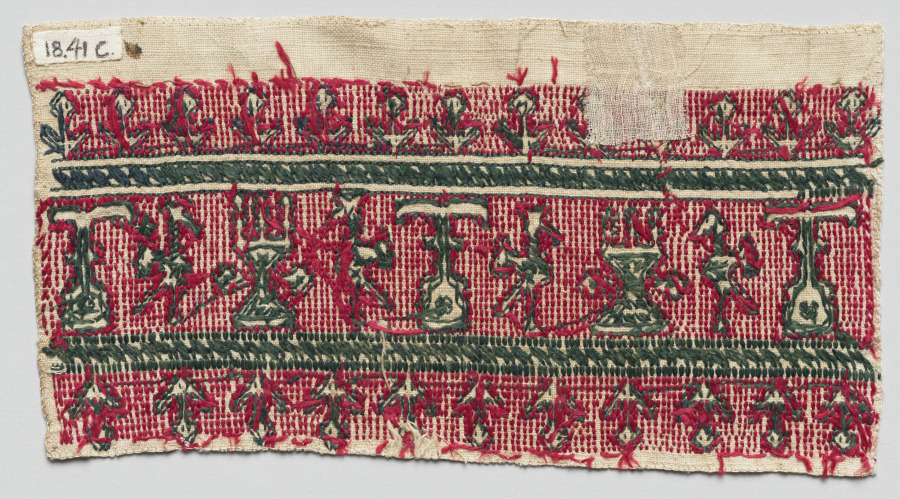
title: Fragment of a furnishing textile (one of five)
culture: Africa, North Africa, Morocco, Azemmour, Moroccan embroiderer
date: 1700s–1800s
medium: Linen, silk, dye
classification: Embroidery